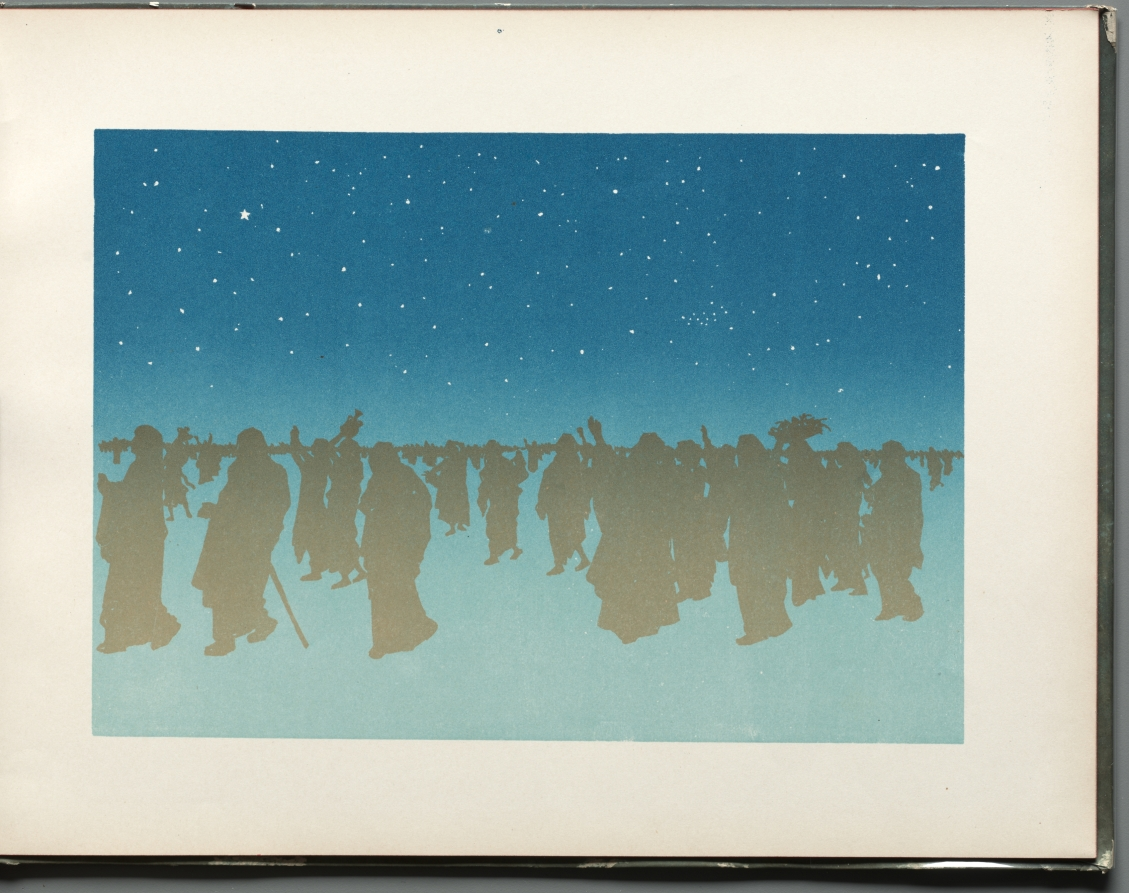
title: The Progress of the Stars: Les Femmes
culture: France, 19th century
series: Bound Volume illustrating the poetry and music of Georges Fragerolle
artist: Henri Rivière (French, 1864–1951)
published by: C. Marpon & Flammarion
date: 1890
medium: 18 color lithographs in a Bound Volume illustrating the poetry and music of Georges Fragerolle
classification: Bound Volume